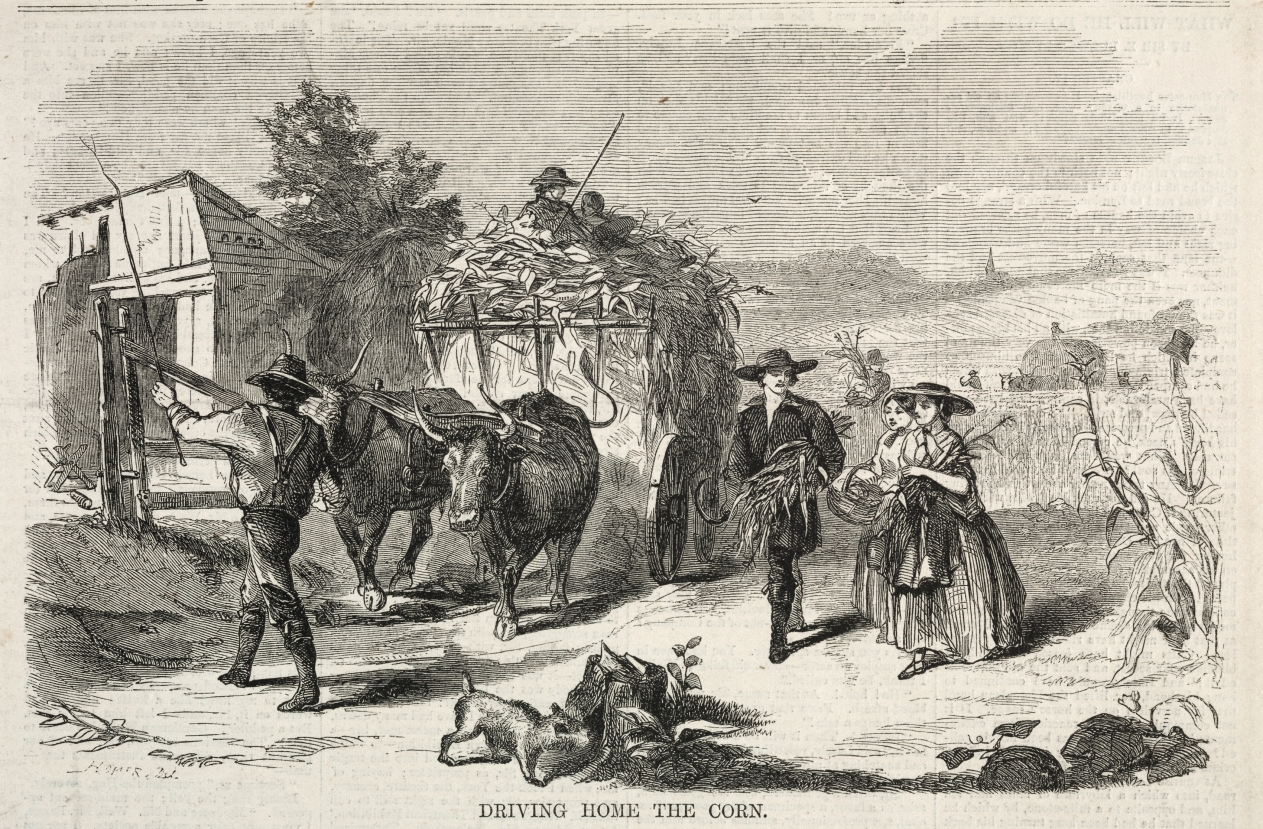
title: Driving Home the Corn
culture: America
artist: Winslow Homer (American, 1836–1910)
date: 1858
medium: wood engraving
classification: Print